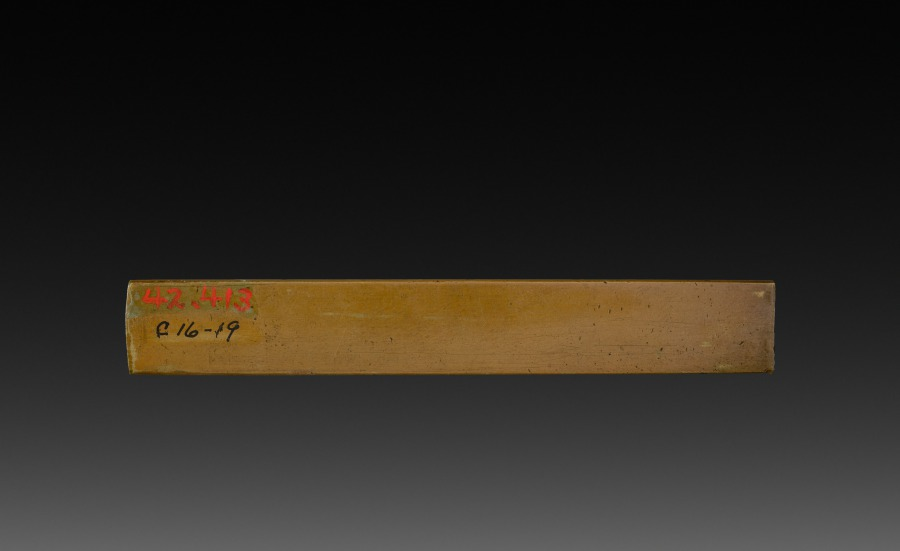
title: Knife Handle (Kozuka)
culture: Japan, Edo period (1615–1868)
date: early to mid-1800s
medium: inlaid bronze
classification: Metalwork